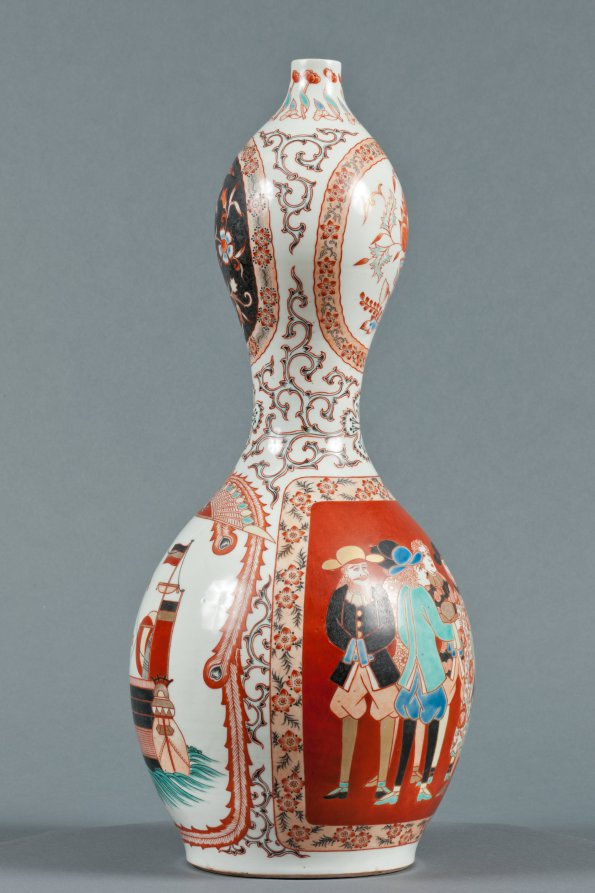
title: Bottle with Western Ships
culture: Japan, Edo period (1615–1868)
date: c. 1800–1868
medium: Porcelain with decoration in colored enamels and underglaze blue, overglaze enamels, and gold (Hizen ware, Arita type)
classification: Ceramic